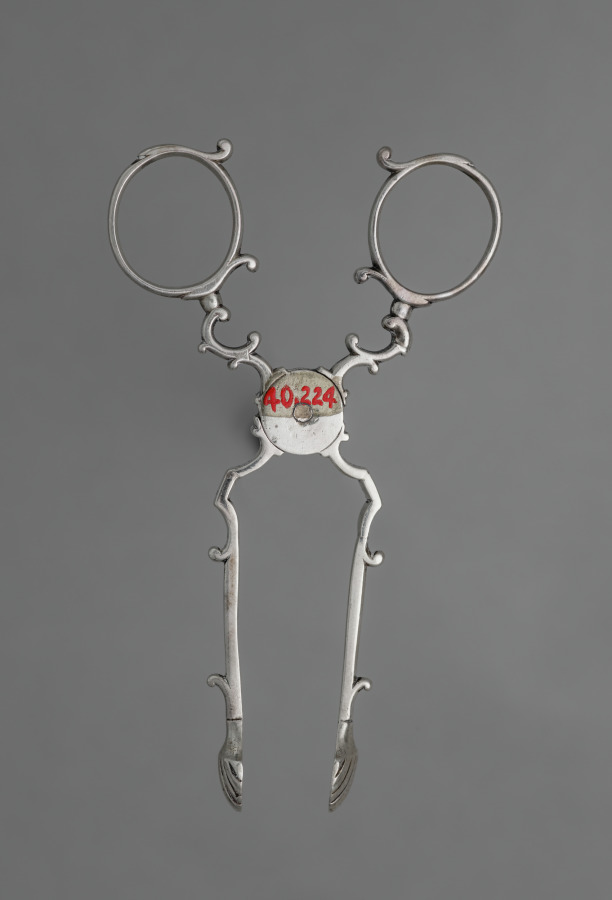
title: Sugar Scissors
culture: England, 18th century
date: c. 1750–1760 and late 19th century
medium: silver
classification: Silver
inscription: engraved Griffin crest on pivot.